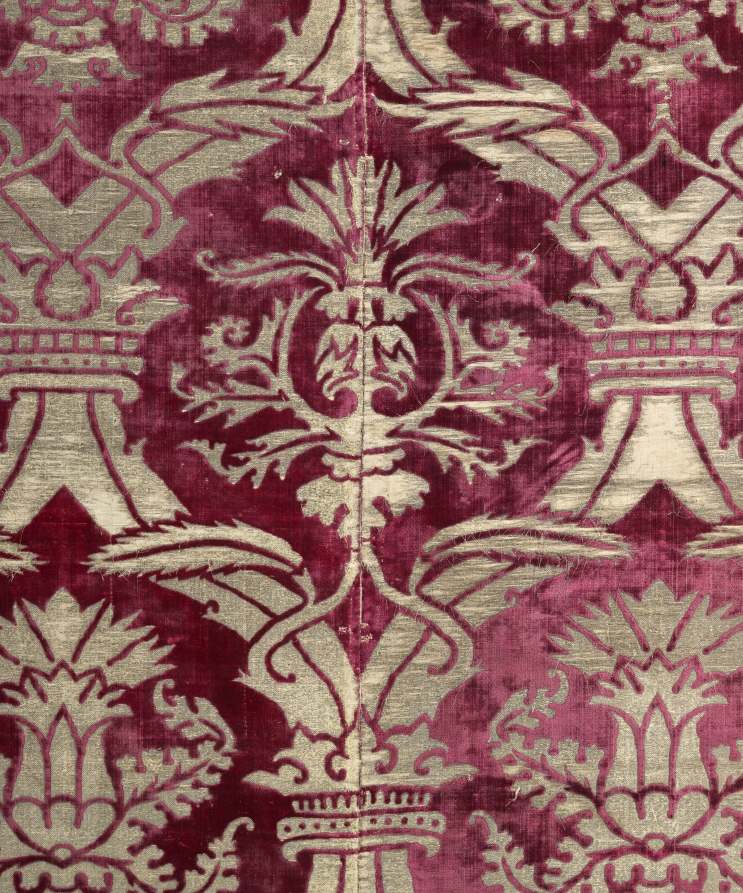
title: Brocaded Velvet Panel with Italianate Pattern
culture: Turkey, Istanbul or Bursa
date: 1575–1625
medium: Silk: velvet, brocaded; gilt-metal thread and cotton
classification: Velvet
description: Rarely are four fabric widths preserved together from any culture. This gilt-metal thread pattern combines Turkish and Italian features: the large ogival (curved) lattice clasped by crowns and the velvet structure are Turkish, and the two so-called artichoke designs are enlarged adaptations of Italian motifs. A symbol of wealth and power, this velvet panel was woven during the artistic height of the Ottoman Empire in the late 1500s. It may have covered a divan (sofa) or possibly enhanced a wall during cold winters in the imperial Topkapi Palace in Istanbul.